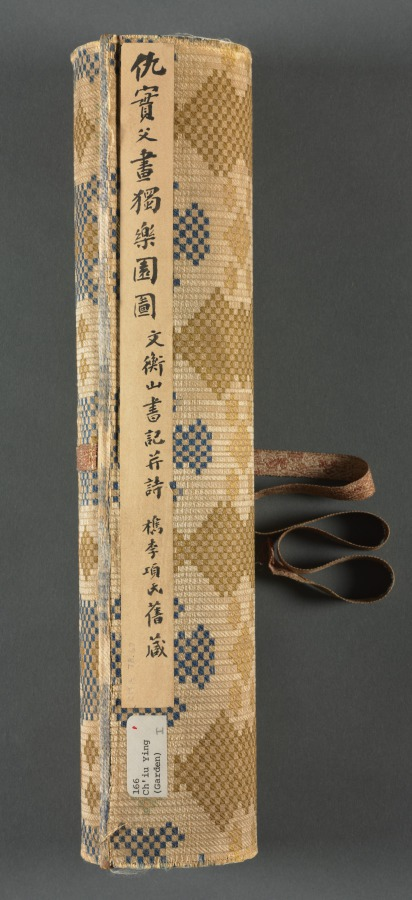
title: Garden for Solitary Enjoyment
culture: China, Ming dynasty (1368–1644)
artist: Qiu Ying (Chinese, 1494–1552)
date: 1515–52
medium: Handscroll; ink and light color on silk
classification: Painting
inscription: Accompanying text of an essay together with seven poems of Sima Guang (1019–1086) and one poem of Su Shi (1037–1101) written by Wen Zhengming (1470–1559) in 1558.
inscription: 2 colophons and 82 seals: 4 seals of Wen Zhengming 文徵明 (1470–1559); 59 seals of Xiang Yuanbian 項元汴 (1525–1590); 1 colophon, dated 1644, and 7 seals of Xiang Yukui 項禹揆 (c. late 1500s–1659); 1 colophon, dated 1880, and 2 seals of Weng Tonghe 翁同龢 (1830–1904); 2 seals of Ch'eng Chen-i (19th c.); 1 seal of Han Ch'ung (19th c.); 4 seals of Wan-go H. C. Weng 翁萬戈 (1918–2020); 3 seals unidentified.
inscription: Colophon by Xiang Yukui 項禹揆 (c. late 1500s–1659): The painting of The Garden for Self-enjoyment on the right by Shih-chou, Mr. Qiu [Qiu Ying] is in the style of Li Lung-mien. Its mood is peaceful, as if meeting the ancient gentlemen face to face among the brushes and silk; it lifts one above the sordid bustle of life. Formerly, my late father handed me this scroll which had only the painting without the written essay. I considered asking a good calligrapher to write the essay to add to it but was afraid that the quality of the writing would not match the painting. Several years later, I saw at a friend's house this essay and poems (of Ssu-ma Kuang] written by Hengshan [Wen Zhengming], once owned by my grandfather; so I spared no expense to obtain it. I rejoiced at this and said: "The divine swords are finally united. How things are pre-destined!" Now my friend Chang Kung-chao's technique for mounting [painting and calligraphy] is excellent. Therefore by daring to take them out and join them together, I can preserve this beautiful story of singular reunion. Xiang Yukui recorded at Hai-yeh-t'ang [hall] two days before New Year's Eve in the jiasheng year of the Chongzhen era [1644]. trans. LYSL/HK/WKH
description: Garden of Solitary Enjoyment refers to a site built in 1073 by the statesman Sima Guang (1019–1086) after he had retired to Luoyang, Henan province. Every spring, visitors would flock to his garden. Each of its seven structures references a historic figure. Sima wrote: I channel streams [like Du Mu], to water flowers [like Bai Juyi], or trim bamboo [like Wang Huizhi]. . . . I know of no joy between heaven and earth that could take its place. Qiu Ying’s painting, created after an 11th-century version of the same theme, must have appealed to garden owners of the Ming dynasty, since it became the template for numerous Suzhou workshop copies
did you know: Sima Guang completed his monumental survey of Chinese history, Zizhi tongjian, in the garden depicted in this painting.